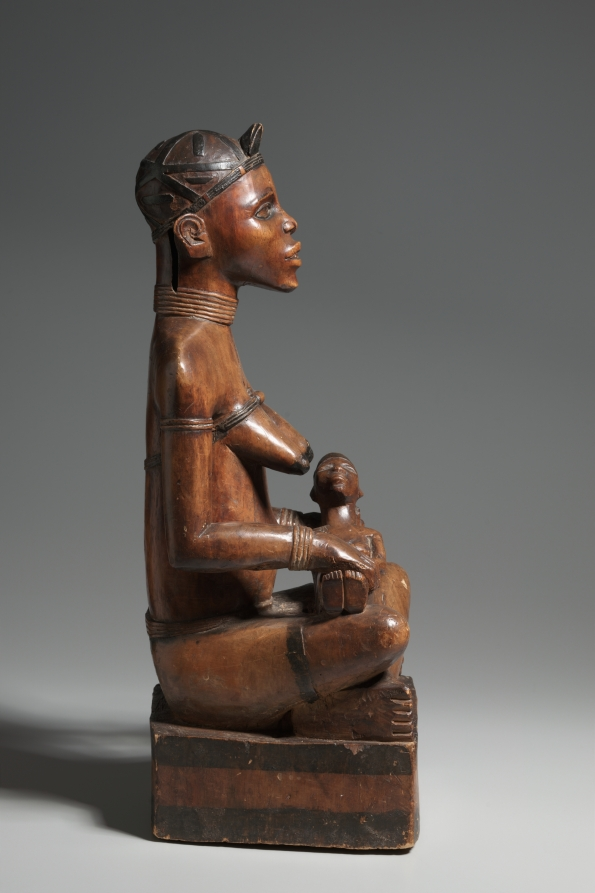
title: Mother and Child Figure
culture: Africa, Central Africa, Democratic Republic of Congo (most likely), Cabinda, or Republic of the Congo, probably Yombe-style maker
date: late 1800s–early 1900s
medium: Wood and paint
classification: Sculpture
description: This Mother and Child Figure is attributed to the Yombe peoples, who inhabit a large territory now divided among the nations of Congo, Democratic Republic of Congo, Zambia, and Angola. Its origin has been traced to the areas surrounding the village of a master carver in the western Democratic Republic of Congo, where similarly carved objects were collected in the early 20th century. Its naturalism suggests that it could have been the portrait of a real person, and thus an excellent testimonial to the immense talent of the artist who carved it. Once referred to as the “Burniaux maternity figure,” after the Belgian collector F. Burniaux, who owned it from about 1930 to 1980, the sculpture was acquired by the Cleveland Museum of Art in 1998.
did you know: The sculpture may have been carved in honor of a woman after her death, or after the death of a male chief. Kongo society is matrilineal, so the chief's right to political power is inherited through the female line.